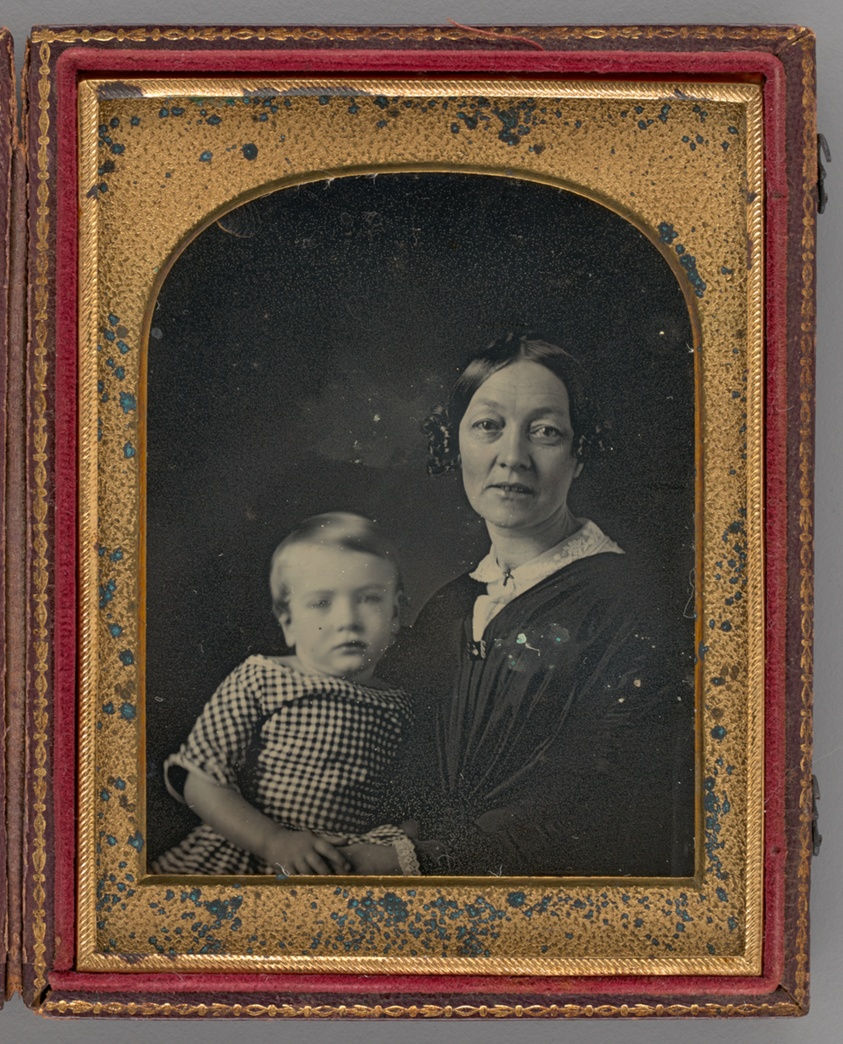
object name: Photograph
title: Untitled (Sarah Perkins Grosvenor Coit and George Coit)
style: 19th century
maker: S. L. Holman; American, 19th century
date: 1849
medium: Daguerreotype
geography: United States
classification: portrait; photograph; photographic process; photography; portrait; daguerreotype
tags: lundberg collection, portraits, portraits: female subject, children, portrait, portraits: child subject, photography